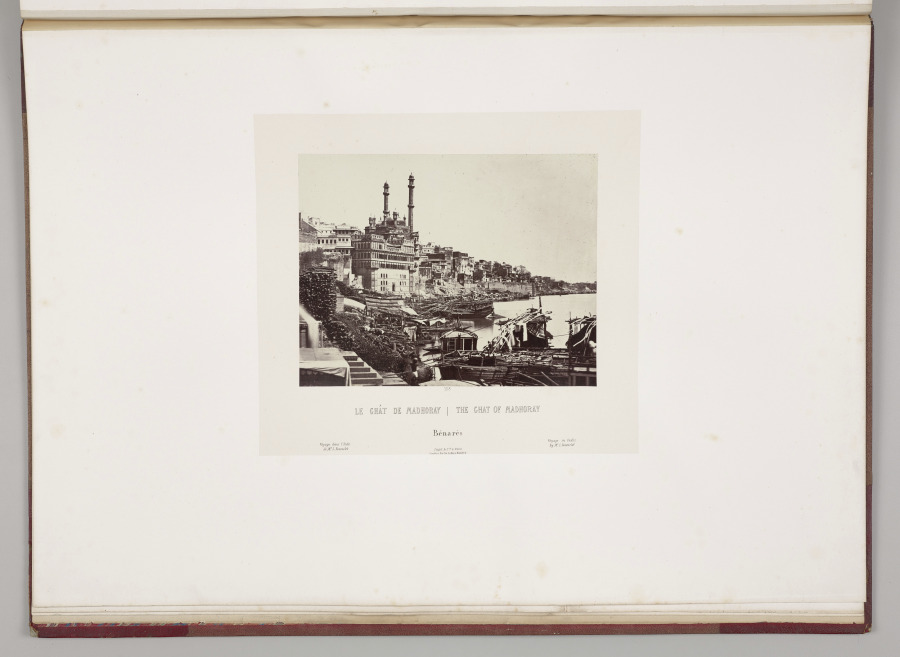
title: The Ghat of Madhoray, Bénarès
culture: France, 19th century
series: India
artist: Louis-Théophile Marie Rousselet (French, 1845–1929)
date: 1865–68, published 1869–70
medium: Albumen print from glass plate negative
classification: Photograph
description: Concerned that his drawings did not do justice to the splendor of India’s monuments, Rousselet learned photography in India that year, a remarkable accomplishment. He proved to be a talented photographer with a sophisticated sense of composition. The scenes in this volume sweep across sites of Sultanate, Rajput, and Mughal power in northern India, from the sacred Hindu city of Varanasi on the Ganges River to Alwar in Rajasthan. Also included are several scenes of industry and portraits of Indian rulers.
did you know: Louis Rousselet described himself as a “scientific traveler” when he went to India alone at age 18 in 1863 and stayed into 1868.